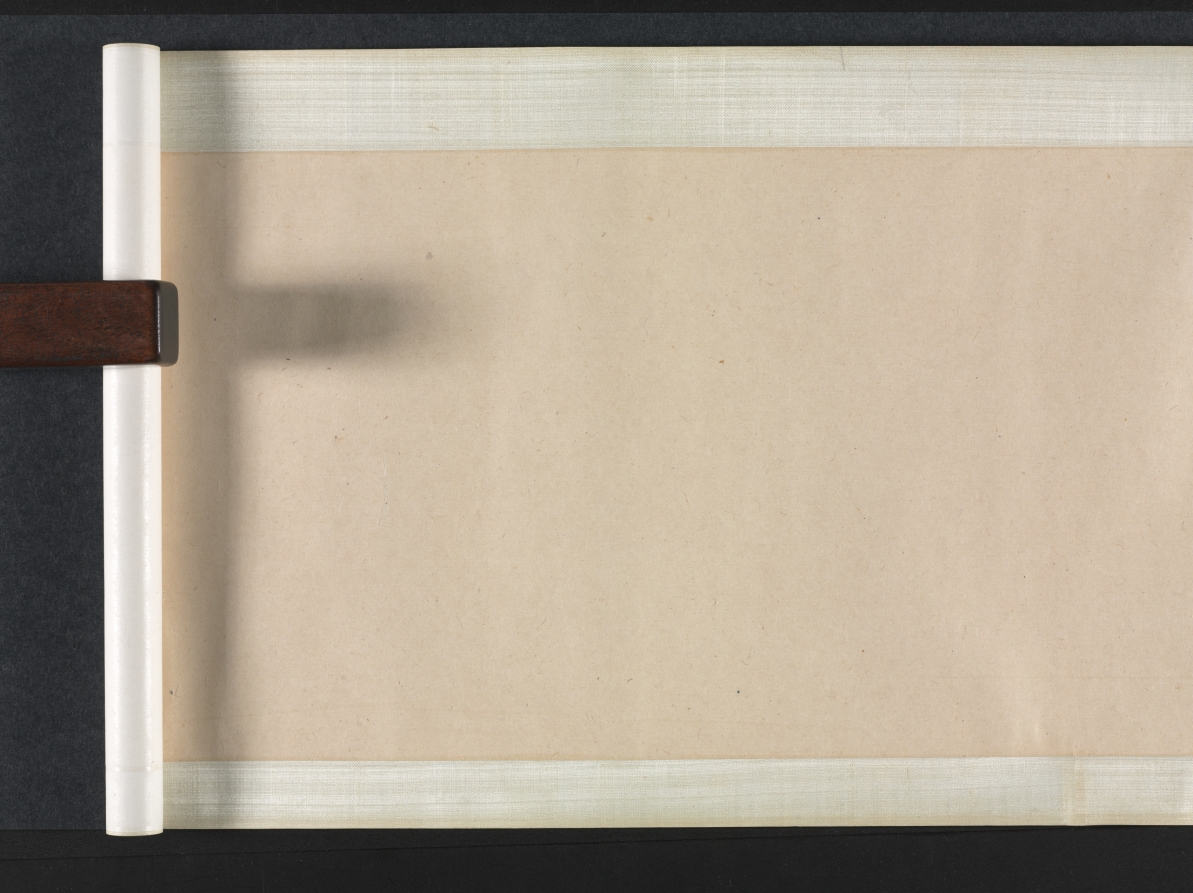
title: Saying Farewell at Xunyang (Song of the Pipa)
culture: China, Ming dynasty (1368–1644)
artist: Wen Boren (Chinese, 1502–1575)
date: 1500s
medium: handscroll, ink and color on paper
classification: Painting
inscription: "潯陽送客圖" 五峰山人文伯仁寫于停雲館中 [印] 文伯仁; 五峰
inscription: 2 colophons and 9 additional seals: 1 transcription of "Pipa xing 琵琶行” (Song of Pipa) and 3 seals of Zhu Yizun 朱彜尊 (1629-1709); 2 seals of Wu Rongguang 吳榮光 (1773-1843); 1 colophon, dated 1826, and 3 seals of Wu Xijia 吳錫嘉 (mid-1700s)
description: This handscroll depicts The Song of the Pipa, a poem by Bai Juyi 白居易 (772–846) written after the poet’s encounter with a pipa player on the Yangzi River. Expelled from her home city when her beauty and fame had faded, she played for the poet at night. Her musical performance and tragic life story resonated with Bai Juyi, who had just been demoted and exiled from life at court himself. The hazy, vast view and pale color tonalities of this painting illustrate these feelings of endless sadness, having lost one’s sense of purpose in life.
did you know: Wen Boren depicted the chilly autumn water with a fishnet pattern.